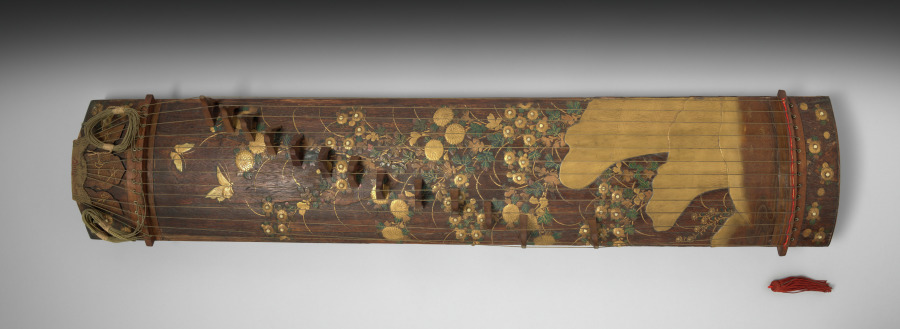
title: Koto (Zither)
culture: Japan, Edo period (1615–1868)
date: early to mid-1800s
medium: Wood with colored lacquer, sprinkled gold powder (maki-e), textile, and silk strings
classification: Musical Instrument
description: This koto has an elaborately decorated surface, suggesting that it was meant to be admired as a decorative object rather than played as a musical instrument. The vertical design shows a profusion of chrysanthemum flowers and miscanthus grass above a brushwood fence as well as a pair of butterflies.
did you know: The koto descended from the guzheng, a Chinese zither first imported to Japan in the seventh century.